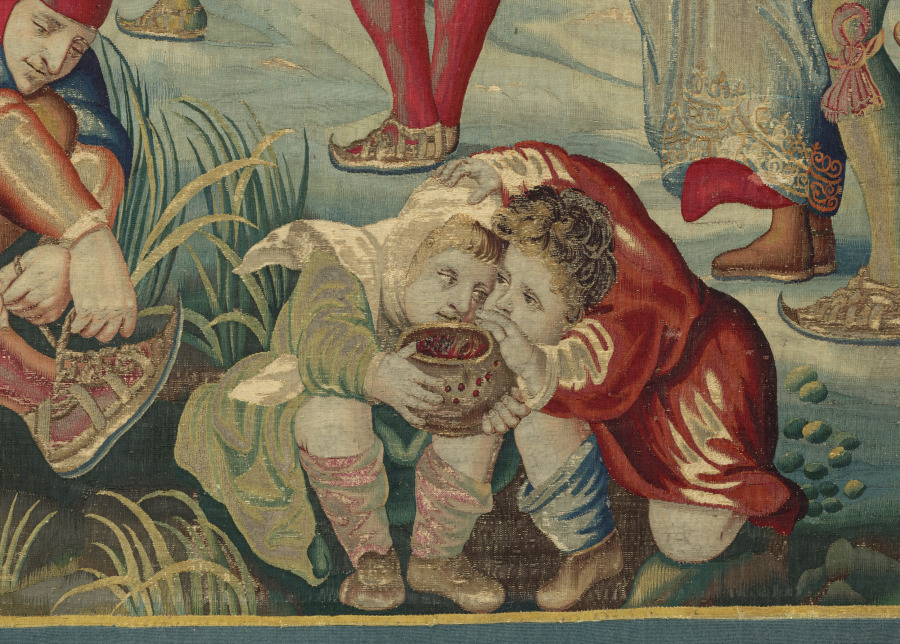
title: Winter: Skating Scene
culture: France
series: Four Seasons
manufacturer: possibly by Gobelins Manufactory (France, Paris, est. 1662)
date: designed c. 1535, woven mid- to late 1600s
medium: Wool, silk, and gold filé: tapestry weave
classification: Tapestry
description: People of all classes and ages enjoyed ice skating, a winter pastime popularized in the Netherlands. Here, some couples are already skating and slipping on the ice, while others tie on their skates or huddle around braziers (portable coal heaters) to keep warm. One affectionate couple in the foreground hold hands as they walk. A castle on the far edge of the frozen lake occupies the background. In the left distance, several small figures holding ladders and long hooks run toward a building that has caught on fire, a frequent occurrence in the winter when wooden houses were heated by fireplaces.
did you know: If you look closely you can see that the top edge of this scene is missing; look at the top of the castle on the right or the forest fire on the left.